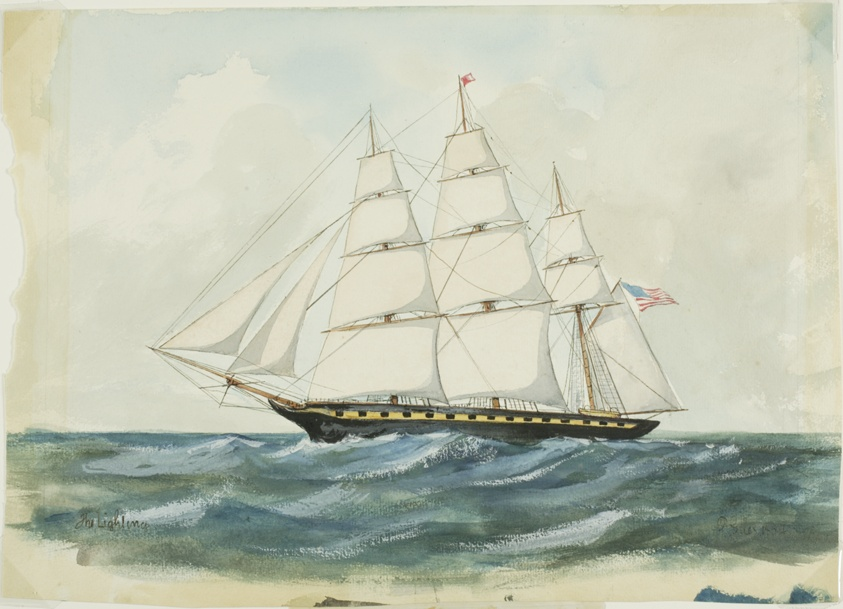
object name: Drawing and Watercolor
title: The Boston Clipper, Lightning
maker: P. Giles (American, 19th century)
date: 1854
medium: Watercolor on paper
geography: United States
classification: watercolor; drawings (visual works); prints and drawing